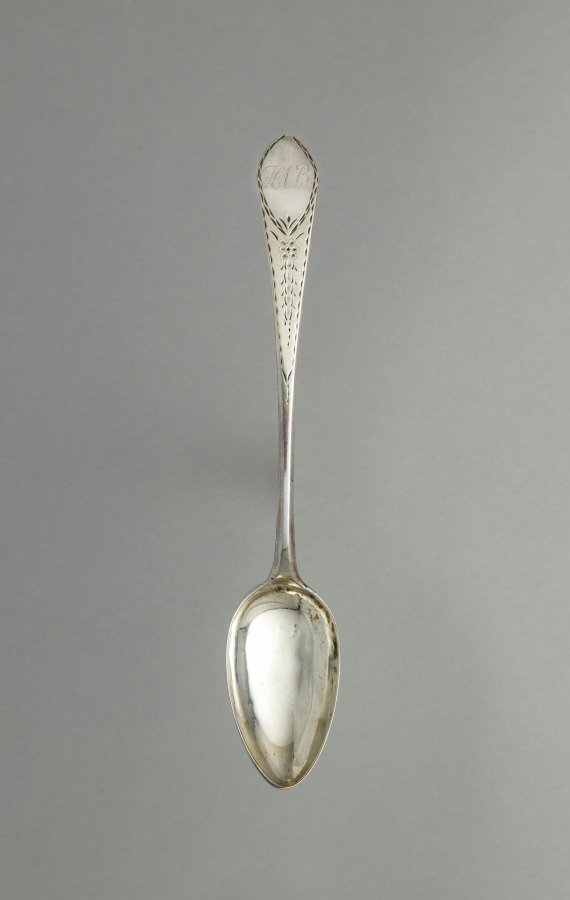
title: Spoon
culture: America, Massachusetts, 18th century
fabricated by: Caleb Beal (American, 1746–1801)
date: c. 1790–1800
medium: silver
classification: Silver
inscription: "HAB" in script within reserve on top at handle end. (Initials of the original owner have not been identified.)